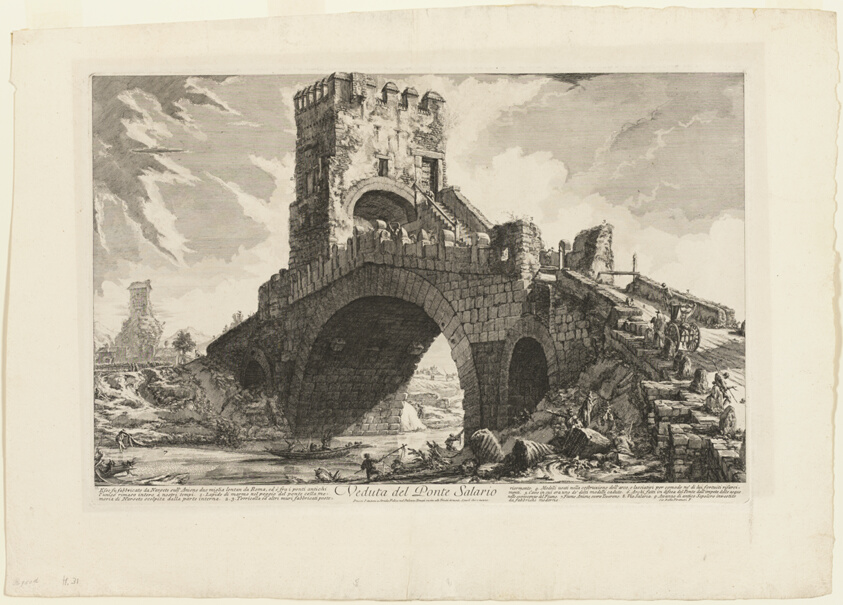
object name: Print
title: View of the Ponte Salario, from Views of Rome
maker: Giovanni Battista Piranesi (Italian, 1720-1778)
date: 1750/59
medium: Etching on heavy ivory laid paper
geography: Italy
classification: etching; print; prints and drawing